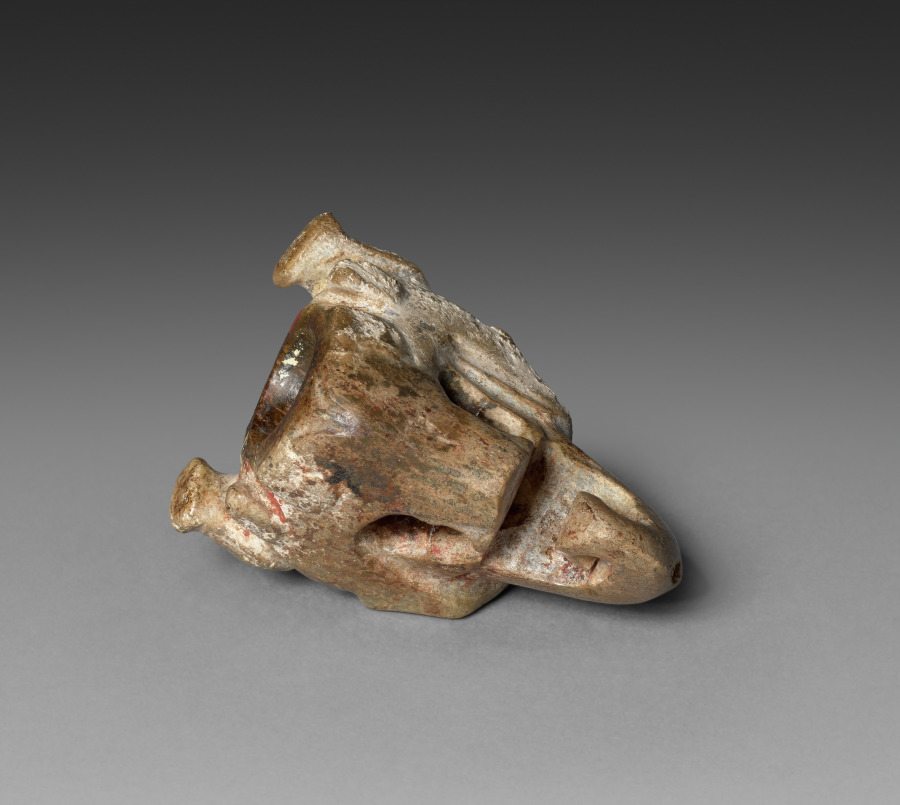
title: Feline Head with Bovine Horns and Elephant Trunk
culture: China, Shang dynasty (c. 1600–c. 1046 BCE)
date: 1300–1000 BCE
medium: jade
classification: Jade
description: This small jade was shaped into a fantastic, composite animal: a feline form with bovine horns and an elephant's trunk.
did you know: The mouth, the underside of the nose, and the tapering hole for attachment at the rear of the head were cut by drilling.